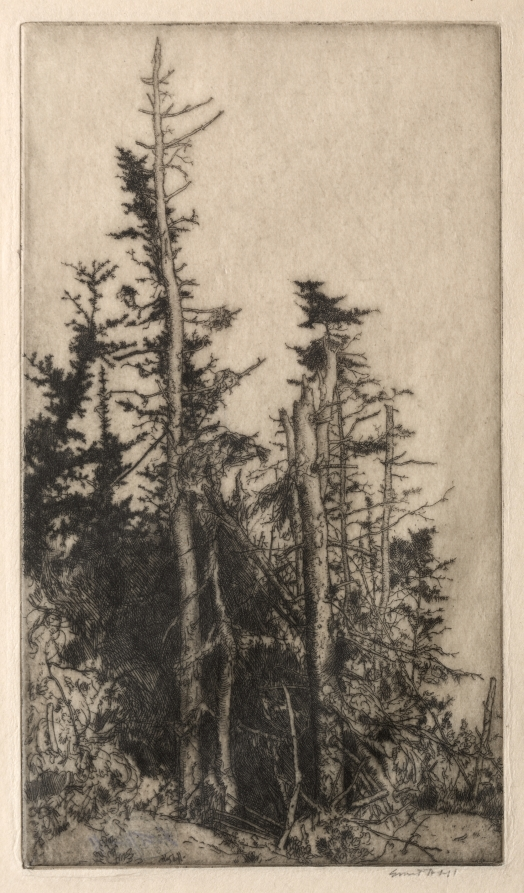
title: Dead Tree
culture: America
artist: Ernest Haskell (American, 1876–1925)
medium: etching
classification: Print